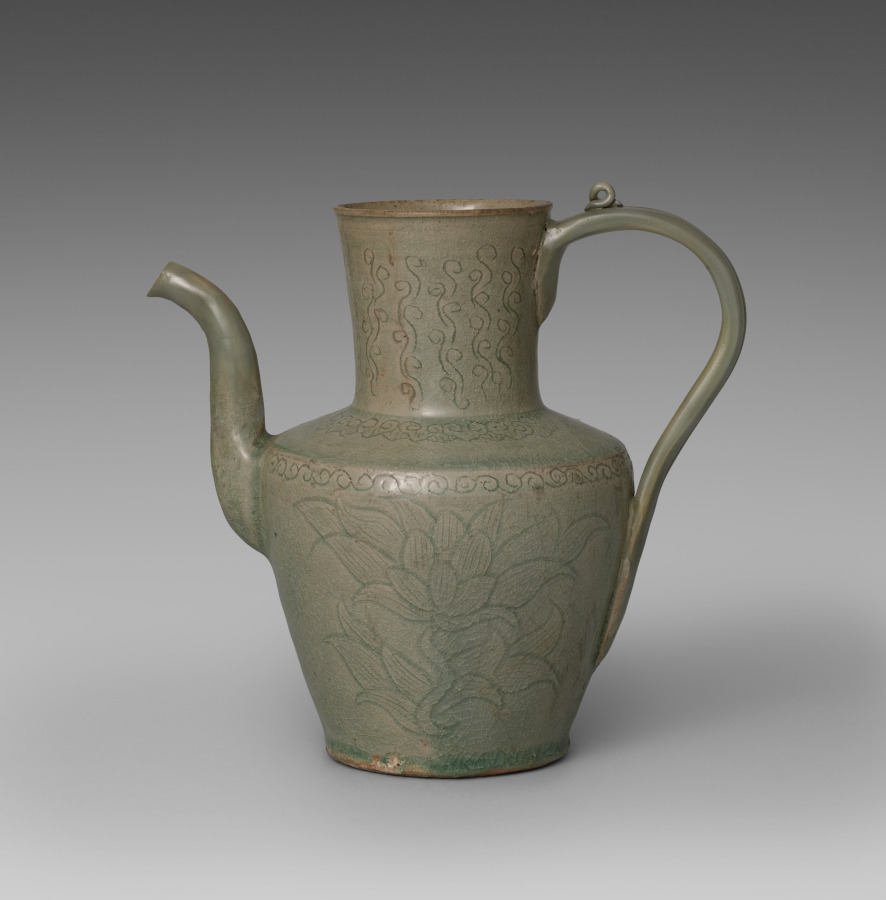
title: Wine Pot with Incised Lotus Design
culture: Korea, Goryeo dynasty (918–1392)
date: 918–1392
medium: celadon ware with incised and carved decoration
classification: Ceramic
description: As early as the seventh century, the practice of drinking tea and wine became an important part of elite culture in Korea. Elites of the Goryeo period commissioned a variety of types of utensils and vessels including this elegant wine pot with the incised image of lotus flowers, not only to make their drinking experience more exciting, but also to show their appreciation of nature.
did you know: A small loop on the handle was intended to secure the lid (now missing) on top of the pitcher through a cord or chain.